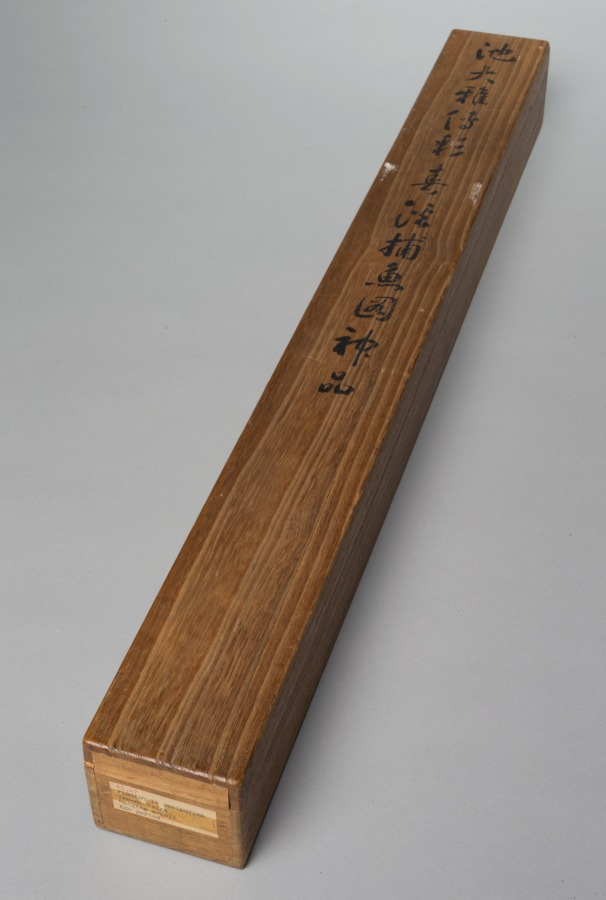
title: Fishing in Springtime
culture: Japan, Edo period (1615–1868)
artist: Ike Taiga (Japanese, 1723–1776)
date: 1700s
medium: Hanging scroll; ink and color on silk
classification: Painting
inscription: Signature: 霞樵, transliteration, Kashō; seals: 池無名印, transliteration, Ike Mumei in; 三岳道者, transliteration, Sangaku Dōja; 遵生, transliteration, Junsei.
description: Ike Taiga was subject to many artistic influences; we know he practiced Zen calligraphy from an early age, his father may have had ties to the famous painter Ōgata Kōrin (1658–1716), he may have trained under a Tosa school painter, and he is thought to have seen Western images early on that informed his approach in representing depth. Though he started with professional beginnings—making a living after his father’s death by selling paintings on fans—he surrounded himself with the members of the literati community, and never stopped absorbing stylistic influences from diverse sources throughout his career. As a result, his style is unique and aesthetically definitive of nanga—the name given to Japanese literati painting.